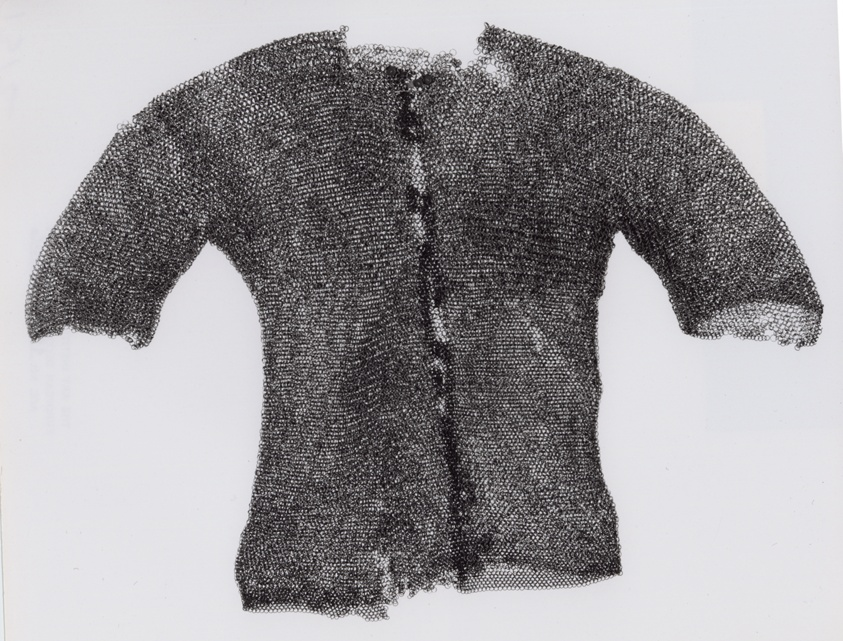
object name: Armor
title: Mail Shirt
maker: Islamic, probably Indian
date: 18th century (?)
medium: Steel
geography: India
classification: suit-element; armor; arms and armor